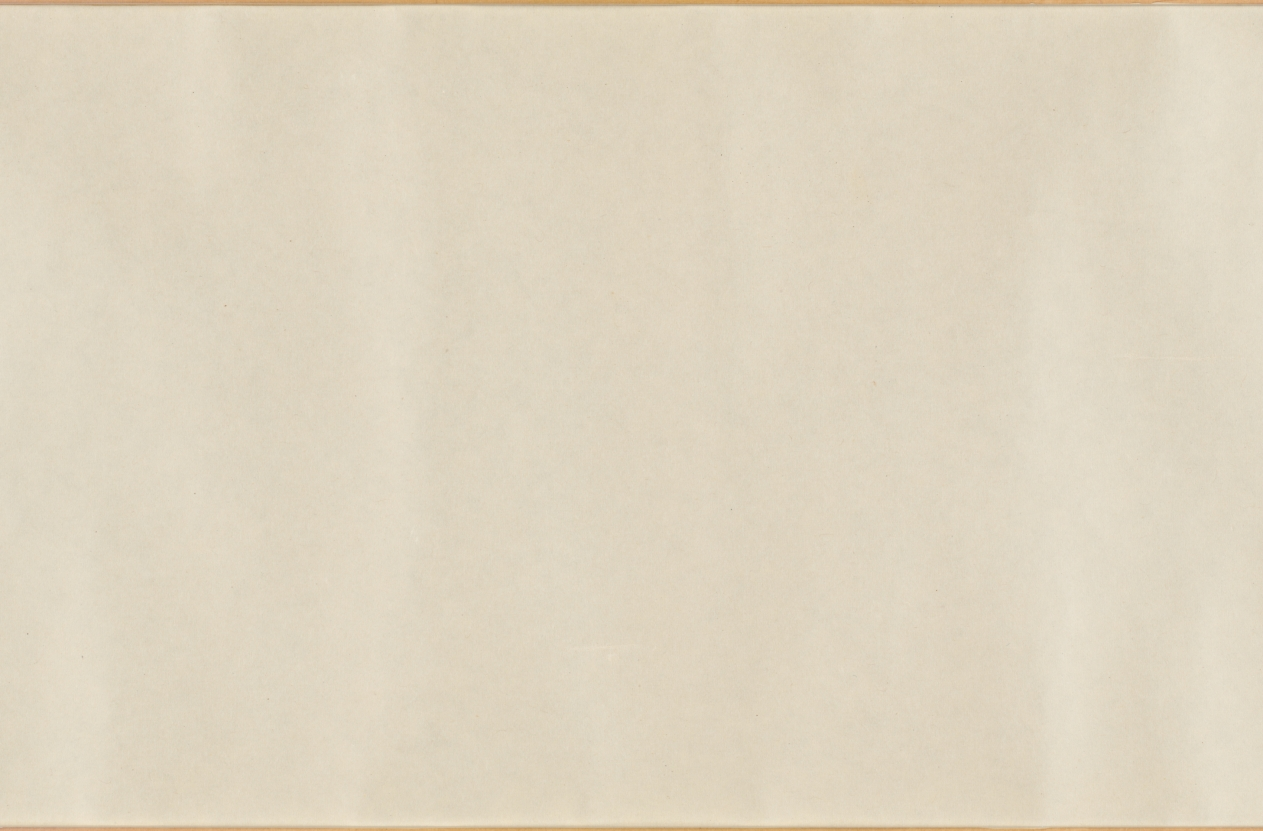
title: Selections from the New Collection of Japanese Poems from Ancient and Modern Times (Shinkokin wakashū) with Printed Designs of Chinese Lions and Crab Finger Grass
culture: Japan, Edo period (1615–1868)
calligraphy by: Hon'ami Kōetsu (Japanese, 1558–1637)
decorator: Tawaraya Sōtatsu (Japanese, c. 1570–c. 1640)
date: early 1600s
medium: handscroll; ink, gold, and silver on paper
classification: Calligraphy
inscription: Seal: 光悦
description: Hon’ami Kōetsu was a calligrapher and craftsman who frequently collaborated with the painter Tawaraya Sōtatsu, considered the first master of the Rinpa school. Kōetsu brushed seven poems from the autumn section of a poetry anthology onto dyed paper with motifs designed and printed in gold and silver by Sōtatsu.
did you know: Before becoming a master painter of screens, Tawaraya Sōtatsu painted fans.